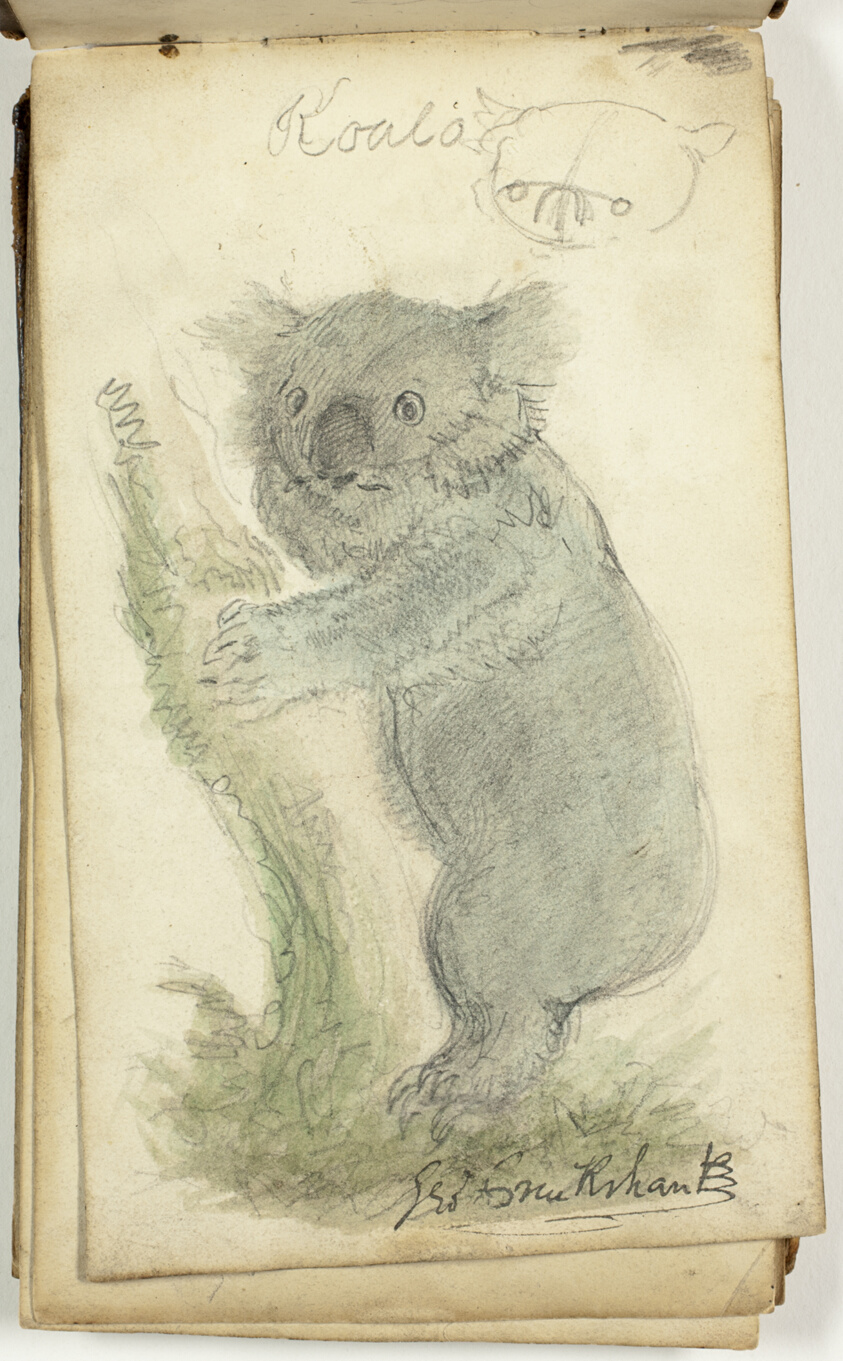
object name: Drawing and Watercolor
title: Sketchbook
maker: George Cruikshank (English, 1792-1878)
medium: Sketchbook with 16 leaves and 34 pages (including endpapers) of drawings in graphite, many with watercolor, pen and ink or gouache, on cream wove paper, with additional drawings on wove and laid papers tipped in, bound with worn calf-covered boards and in a red levant morocco slip case lined in red watered silk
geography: England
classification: sketchbook; drawings (visual works); book; prints and drawing